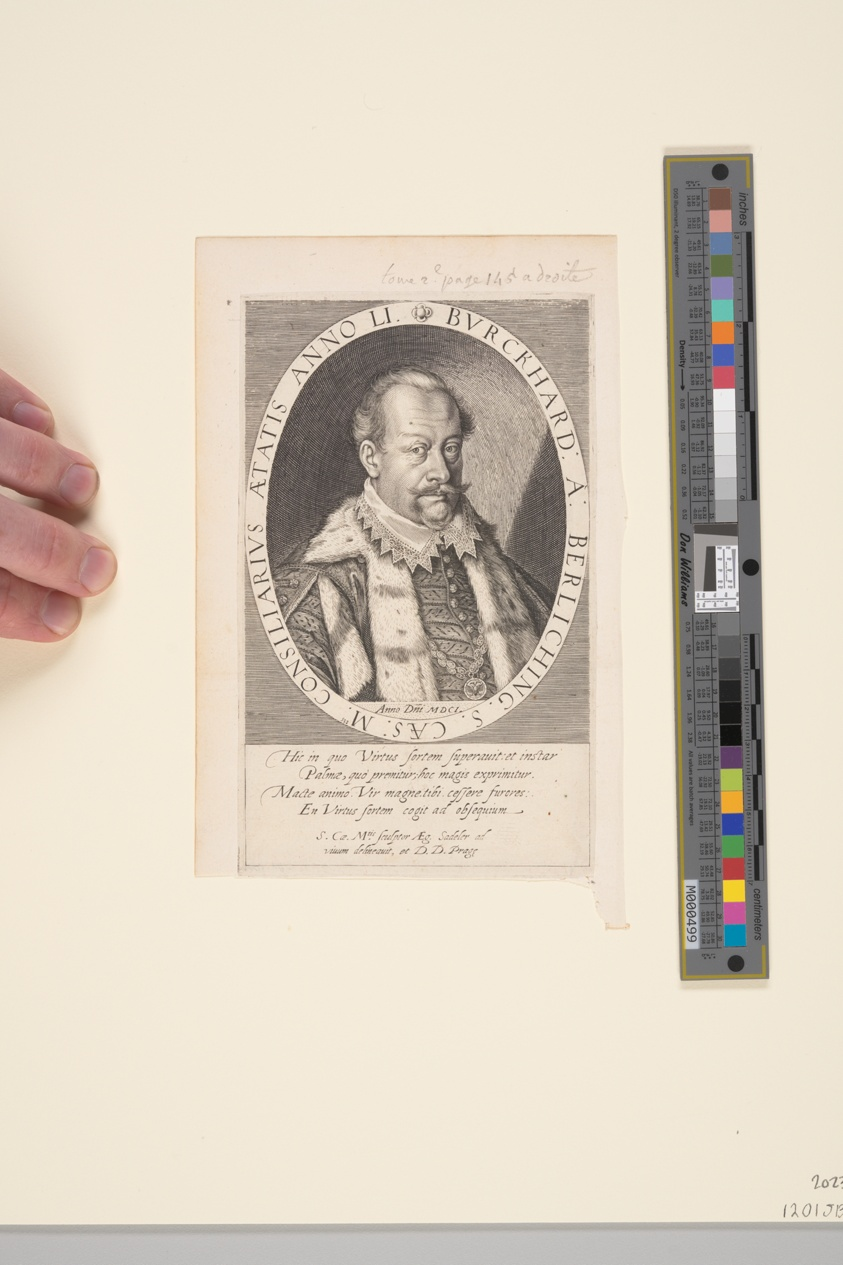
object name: Print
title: Burkhard von Berlichingen, Councilor to Rudolph II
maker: Aegidius Sadeler II; Flemish, c. 1570–1629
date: 1601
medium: Engraving on paper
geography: Flanders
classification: engraving; paper; print; prints and drawing